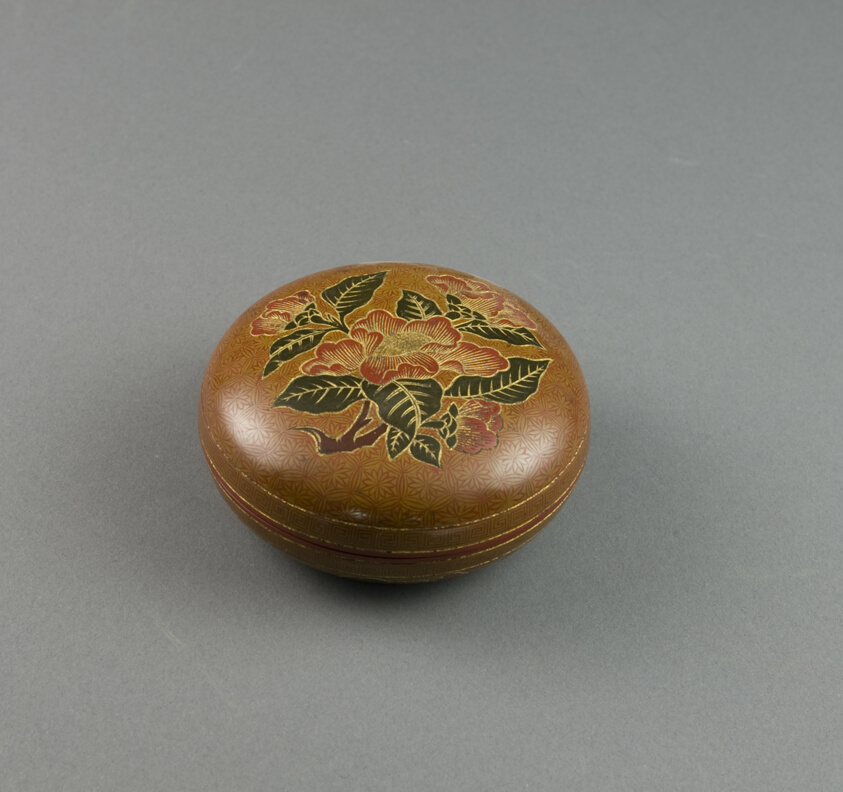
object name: Vessel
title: Covered Box with Peony Flower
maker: China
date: Ming dynasty (1368–1644), 15th century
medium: Laquer with inlaid and incised decoration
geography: China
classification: lacquerware; asian art